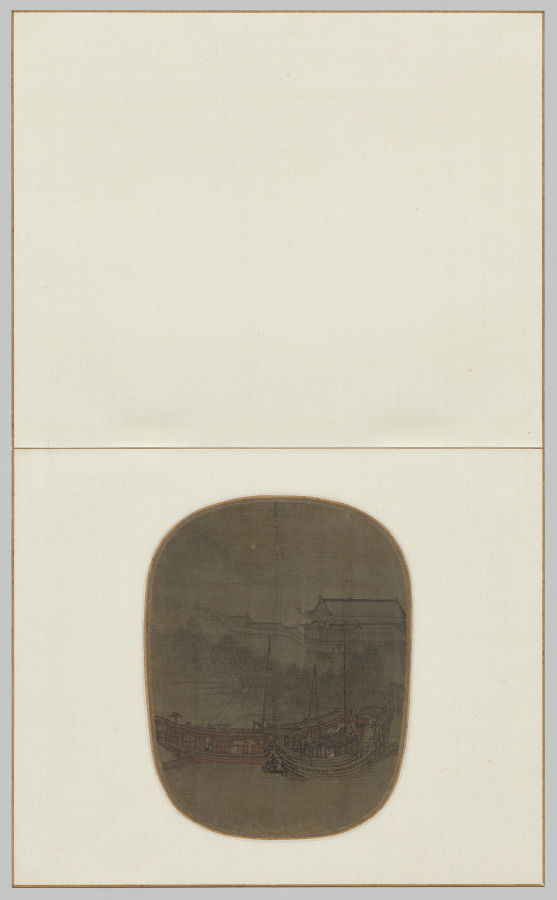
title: Boats at Anchor on West Lake at the City Gate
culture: China, Southern Song dynasty (1127-1279)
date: 1150–1200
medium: Album leaf; ink and color on silk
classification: Painting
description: Highlighted with a few bright accents, this fan painting conveys a nightly atmosphere with boats anchoring on West Lake at the foot of the city walls. Willow trees line the embankment, and the moon appears above the mountains. While the city is asleep, a figure wearing red inside a boat holds what appears to be a pipa (plucked stringed instrument), while a blue-robed gentleman nearby gazes toward the sound of music, evoking an association with Song of the Lute (Pipa xing) by Tang poet Bai Juyi (772–846) which tells the story of a romantic encounter on the Yangzi River.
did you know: The depiction of the female figure playing the pipa and the scholarly male evokes an association with a romantic encounter narrated in a well-known Tang dynasty poem.